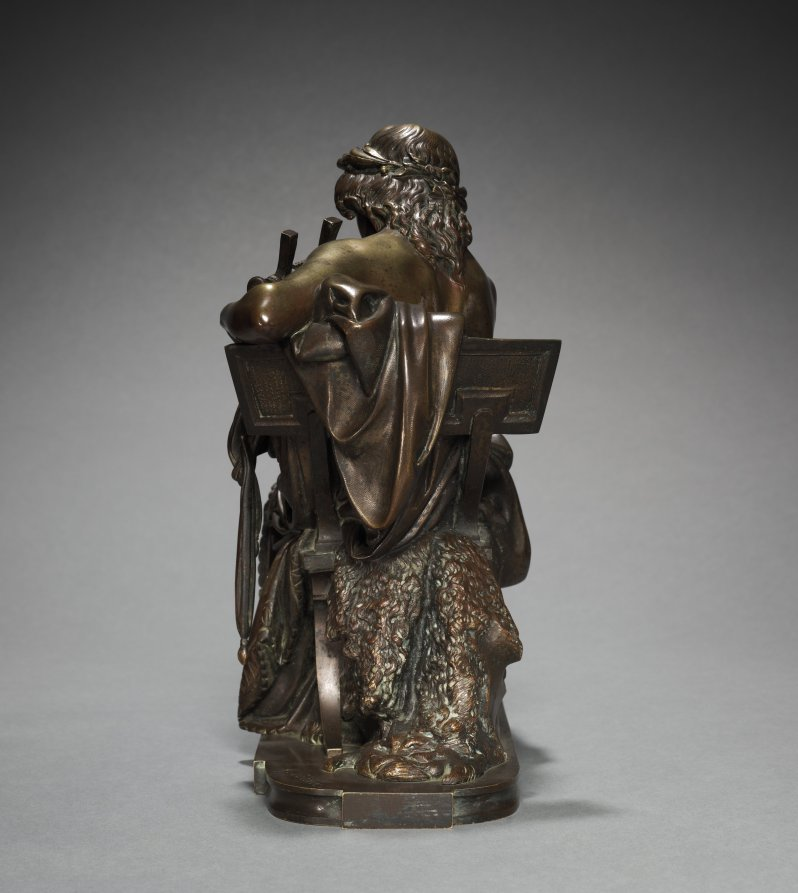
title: Orpheus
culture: France, 19th century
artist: Albert-Ernest Carrier-Belleuse (French, 1824–1887)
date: early 1860s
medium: bronze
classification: Sculpture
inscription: Signed: "A. Carrier"; inscribed: "Boyer"